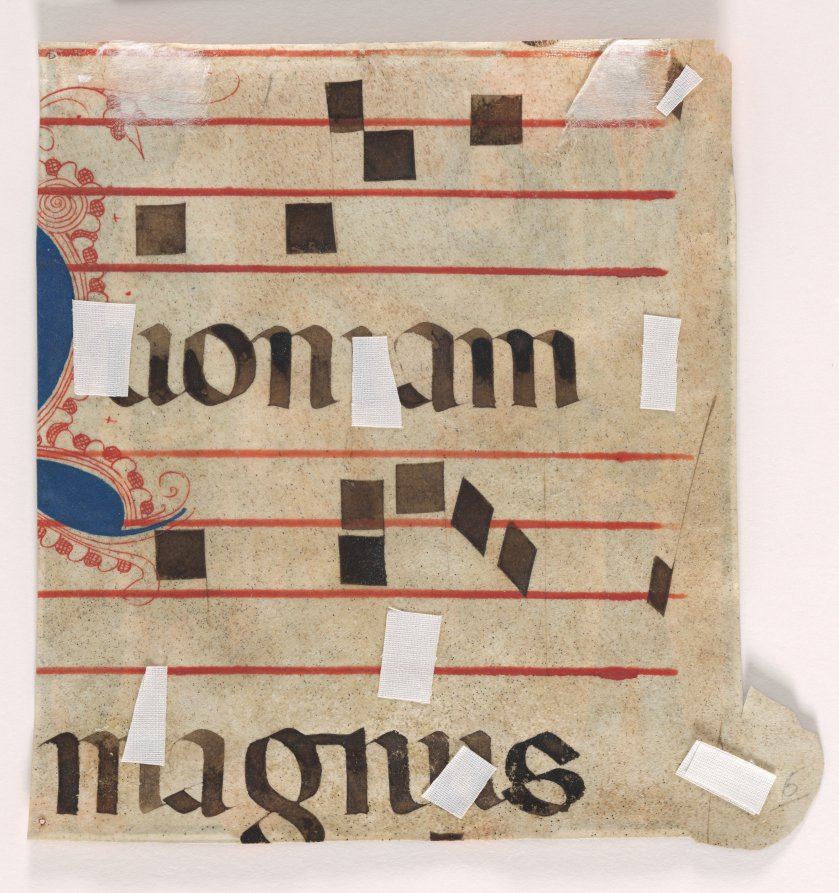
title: Cutting from a Gradual: Initial I with Departure of Tobias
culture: Italy, Florence, 14th century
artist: "Master of Noah's Ark" (Italian)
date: c. 1390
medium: ink, tempera, and gold on vellum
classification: Manuscript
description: The Master of Noah’s Ark was named after an illuminated initial containing that subject now in the Vatican Library. Though he may have worked in Florence, he was unlikely to have been Florentine himself. This rare miniature depicts the story from the apocrypha of Tobias, son of Tobit, a devout Jew in exile who is blind and destitute. Sent out to visit relatives in a distant city in order to find a means of supporting the family, the young Tobias is guided by the Archangel Raphael. This miniature shows the sad and traumatic moment of Tobias’s departure in “continuous narrative” within the same scene (right to left). Within the doorway Tobit and his wife, Anna, are apprehensive. In the center, Tobit prays to God, represented here as the Trinity with two faces and the flame of the Holy Ghost. On the left, Tobias departs with his staff over his shoulder. This initial I would have introduced the text Inclina, Domine, aurem tuam ad me (Turn your ear, O Lord, and hear me). It marks the opening of the 15th Sunday after Pentecost and the beginning of the Introit to the Mass.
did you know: The volume from which this leaf comes is located at the central library of the Augustinian Province of Italy.